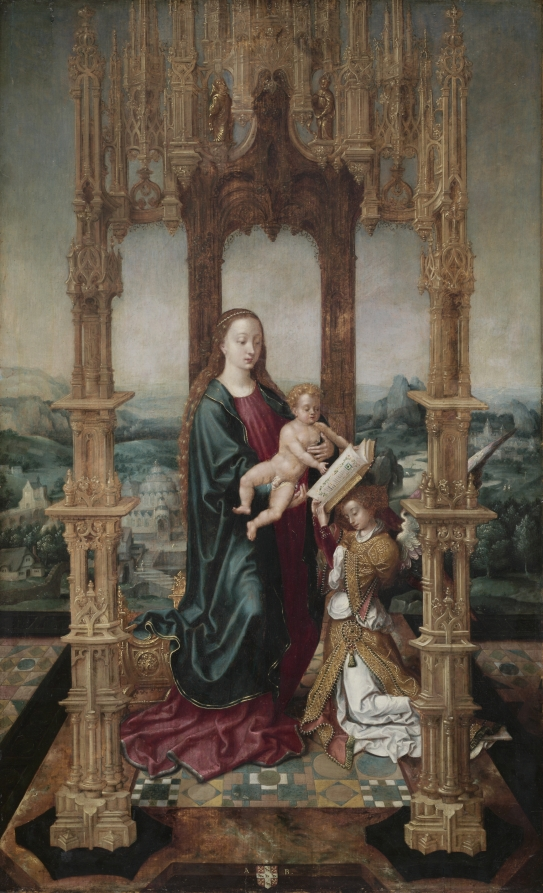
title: Virgin and Child under a Canopy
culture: South Netherlands, 16th century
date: 1520s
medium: oil on wood panel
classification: Painting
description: Scholars continue to debate the identity of this artist and the original source of the painting. The small coat of arms and initials at the bottom have not yet been identified. The arms may refer to a family, a city, or a bishopric. The style seems to relate to Bruges painting of the early 1500s, however the slightly mannered treatment of the child may point to Antwerp.